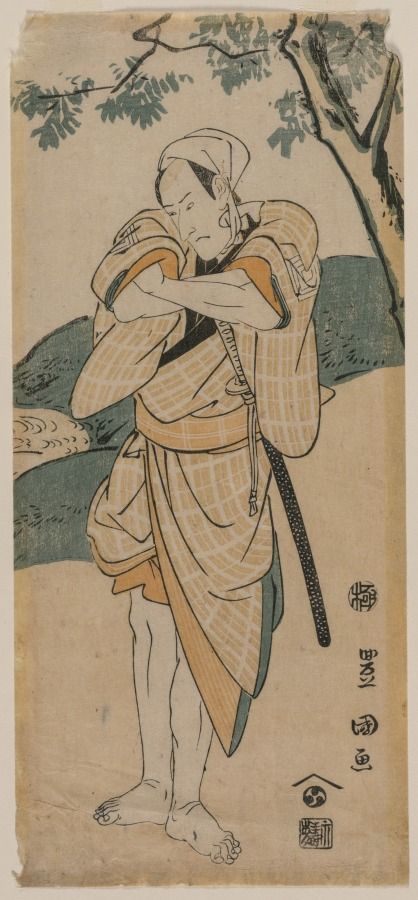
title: The Actor Ichikawa Danjuro as a Samurai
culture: Japan, Edo period (1615–1868)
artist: Utagawa Toyokuni (Japanese, 1769–1825)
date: 1769–1825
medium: color woodblock print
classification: Print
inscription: Signature: Toyokuni Ga Publisher's Mark and Seal: Eijudo